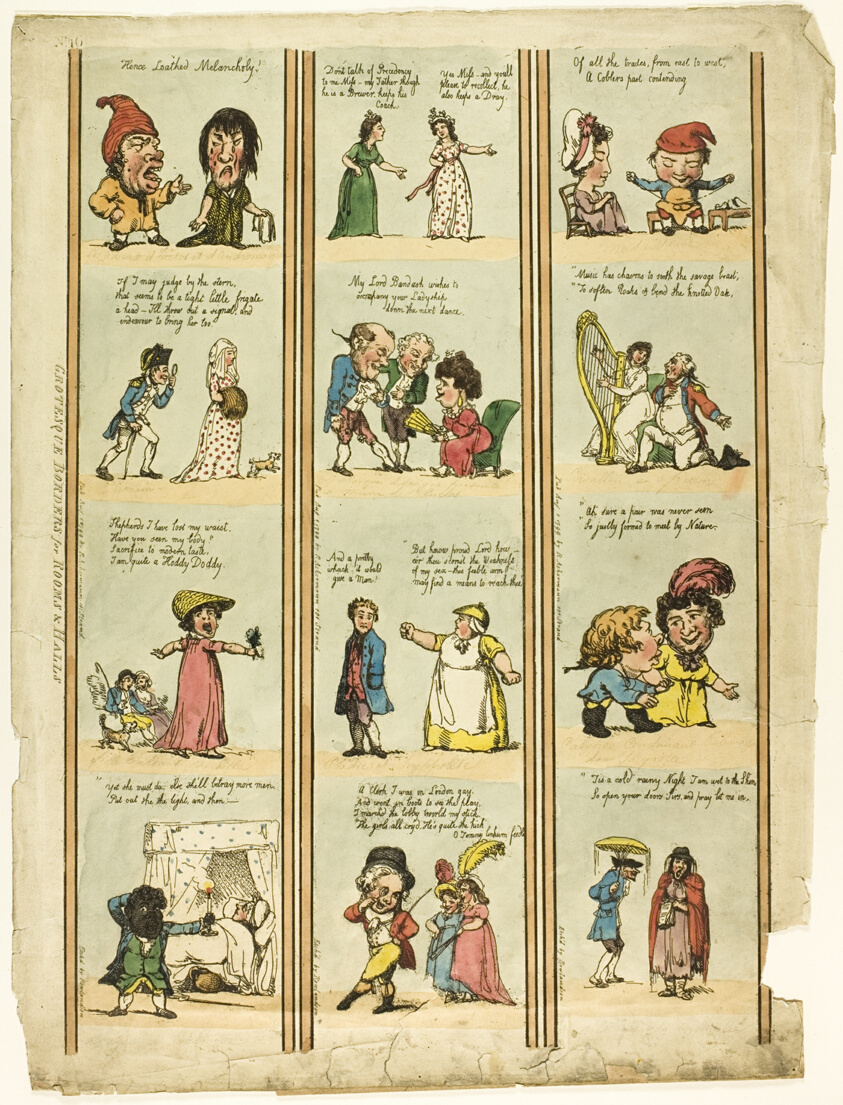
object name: Print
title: Grotesque Borders for Halls & Rooms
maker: Thomas Rowlandson (English, 1756-1827); after George Moutard Woodward (English, c. 1760-1809); published by Rudolph Ackermann (English, 1734-1834)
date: published August 1799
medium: Hand-colored etching and stipple engraving on ivory wove paper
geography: England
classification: etching; print; prints and drawing